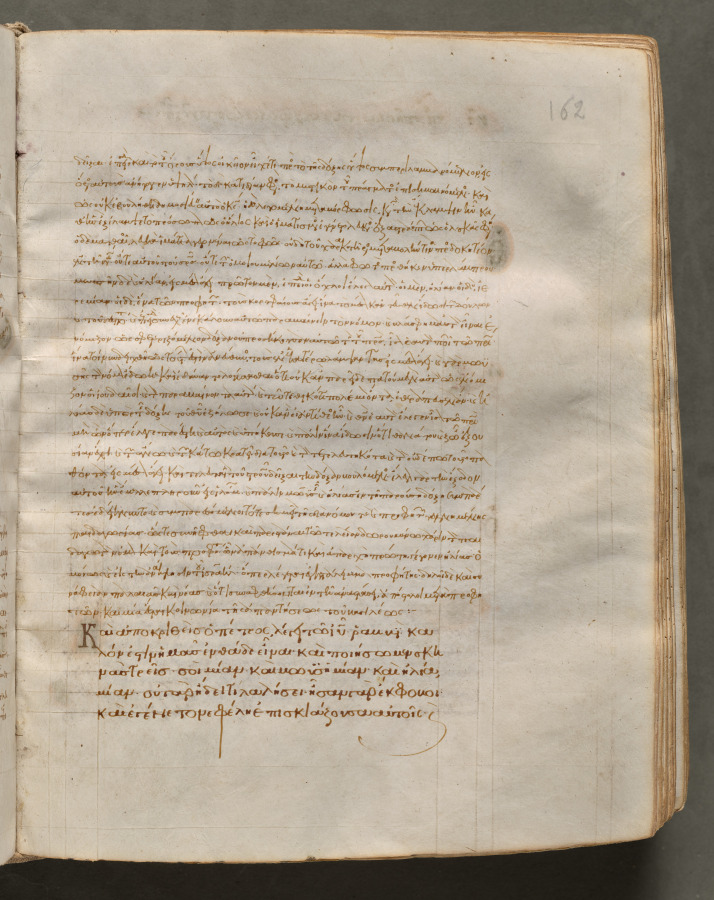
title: Text, folio 162 (recto), from a Gospel Book with Commentaries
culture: Byzantium, Constantinople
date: c. 1000–1100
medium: ink, tempera, and gold on vellum; leather binding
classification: Bound Volume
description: Each of the four gospels in this book opens on a page with brilliantly illuminated borders depicting the author of the text as well as birds-principally peacocks, symbols of the immortality of the soul-and fountains, representing the fountain of life and the salvation of the soul. This volume consists of 428 leaves with texts in Greek. Its level of sophistication suggests that it was probably written and decorated in a monastery in Constantinople.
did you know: Gospel Books were carried in procession through Byzantine churches.